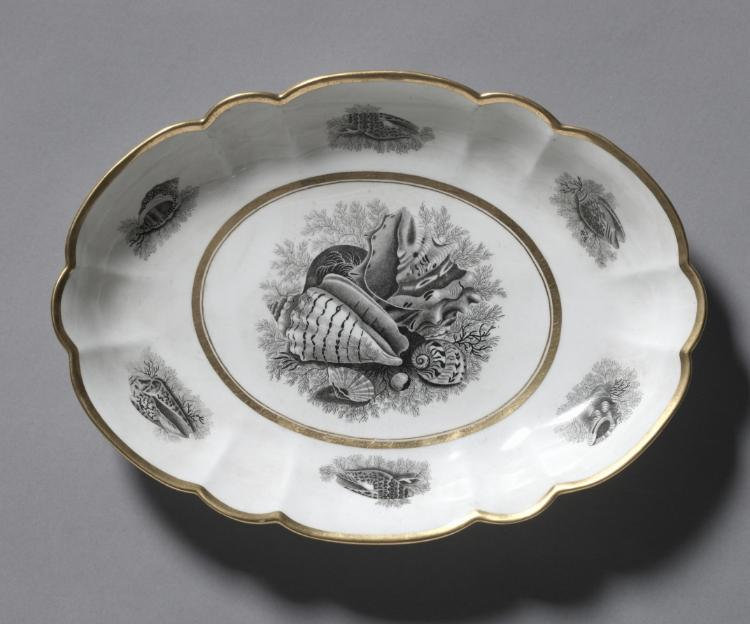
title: Oval Dish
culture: England, 19th century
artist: Barr, Flight & Barr (British)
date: 1807–1813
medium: porcelain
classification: Ceramic